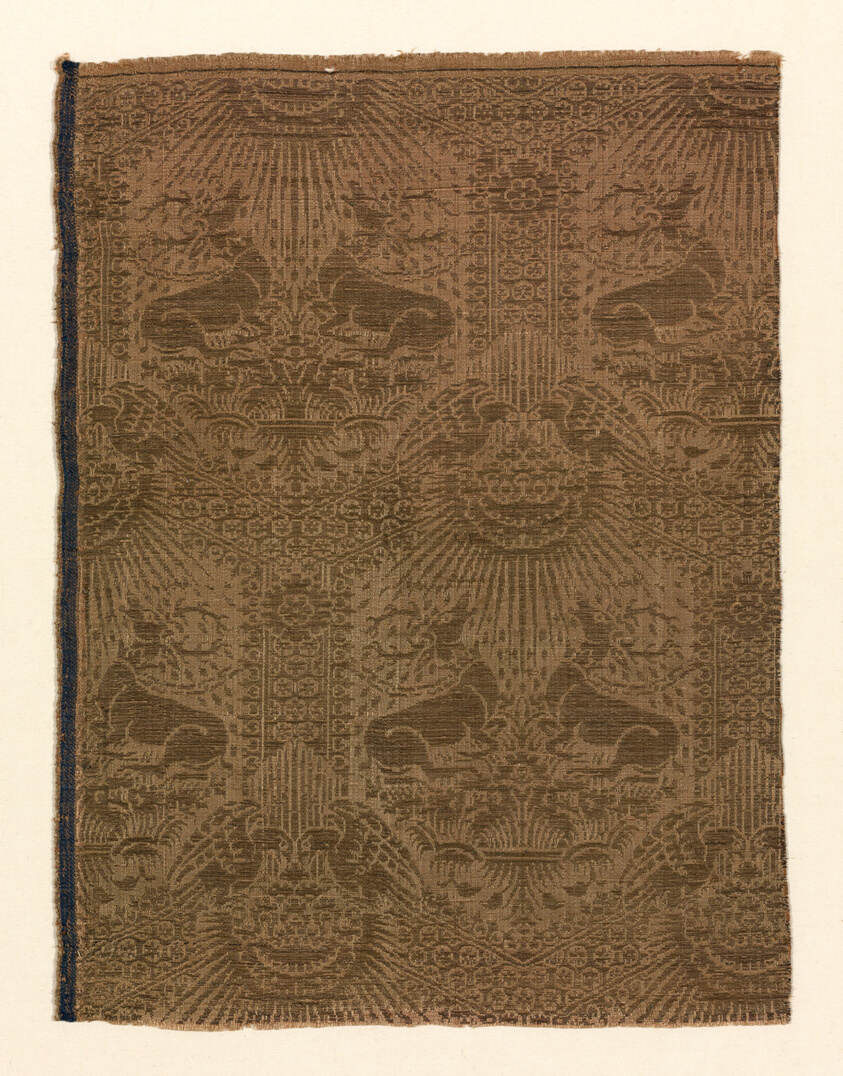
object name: Textile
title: Fragment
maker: Italy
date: 1401/50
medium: Silk and gilt-animal-substrate wrapped linen, warp-float faced 2:1 twill weave with weft-float faced 1:2 's' twill weave interlacings of secondary binding warps and supplementary patterning wefts; left selvage present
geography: Venice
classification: textile; weaving